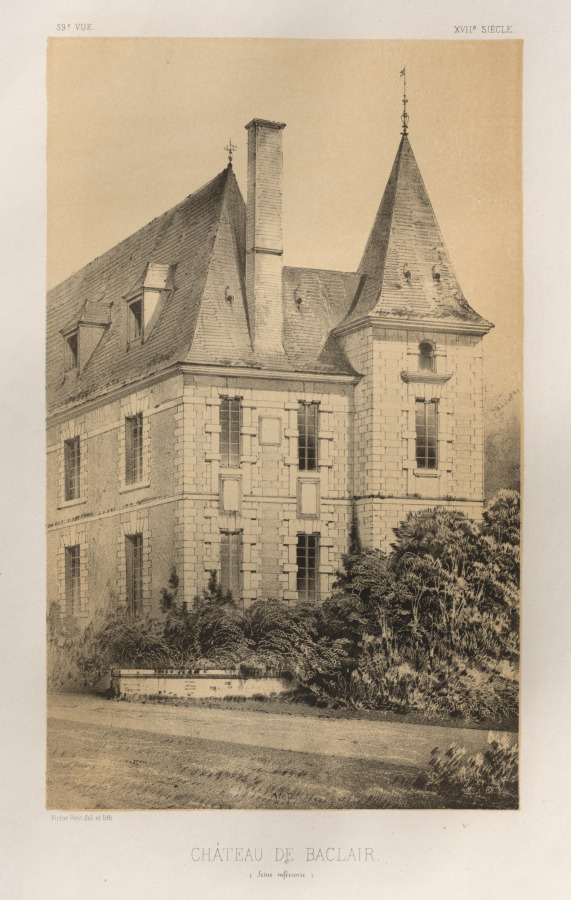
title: Architecture Pittoresque ou Monuments des XVeme. Et XVIeme. Siecles: Chateaux de France des XV et XVI Siecles: Pl. 59, Château De Baclair (Seine inférieure)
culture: France, 19th century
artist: Victor Petit (French, 1817–1874)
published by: Charles Boivin (publisher and editor); Lith de Godard a Paris (printer)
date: 1860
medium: lithograph with tint stone, from portfolio of 100 lithographs with tint stone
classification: Print